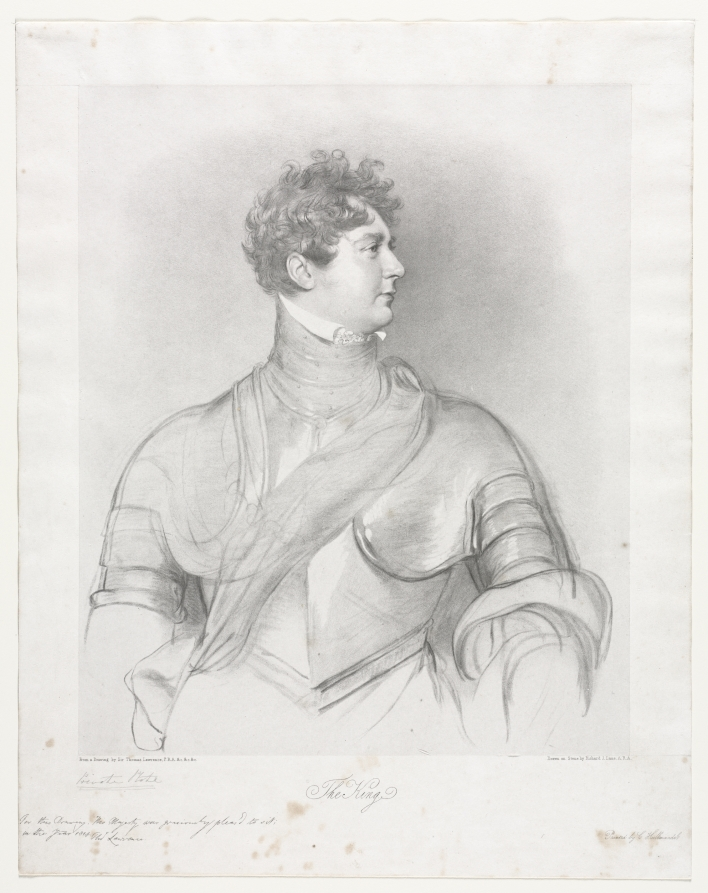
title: The King, George IV of Great Britain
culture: England, 19th century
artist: Richard James Lane (British, 1800–1872)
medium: lithograph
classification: Print